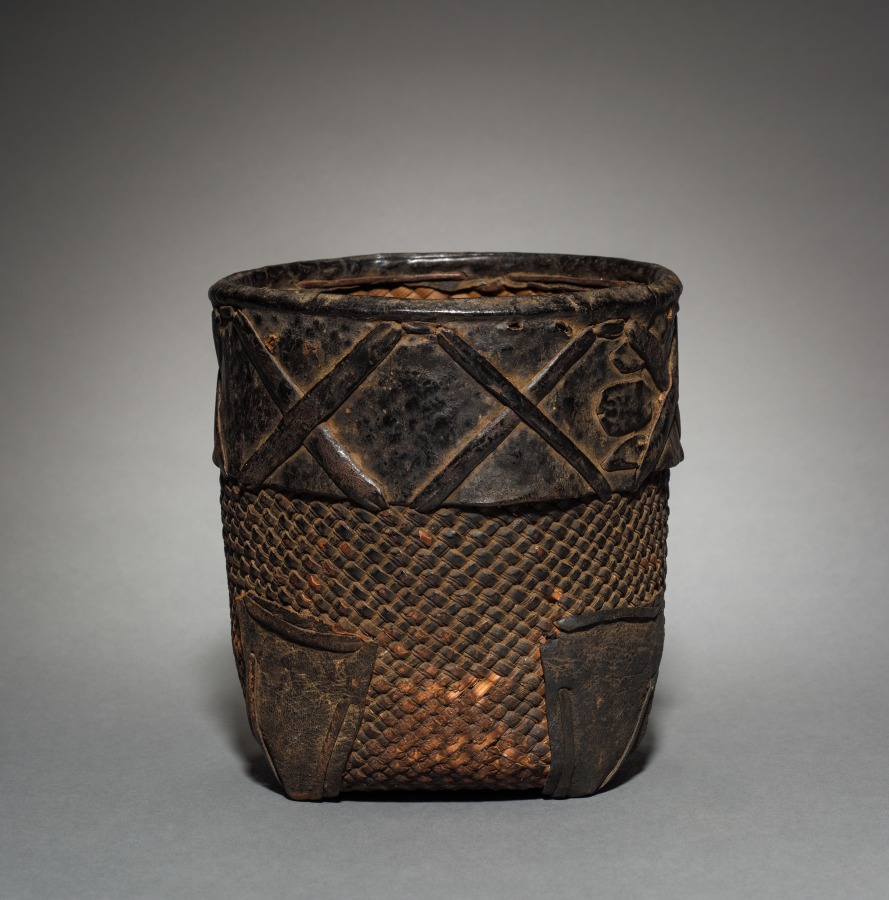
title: One of Ten Nesting Wedding Baskets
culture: Africa, Western Africa, Burkina Faso, Lobi–style maker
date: c. 1900s?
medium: Plant fiber and leather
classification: Vessels